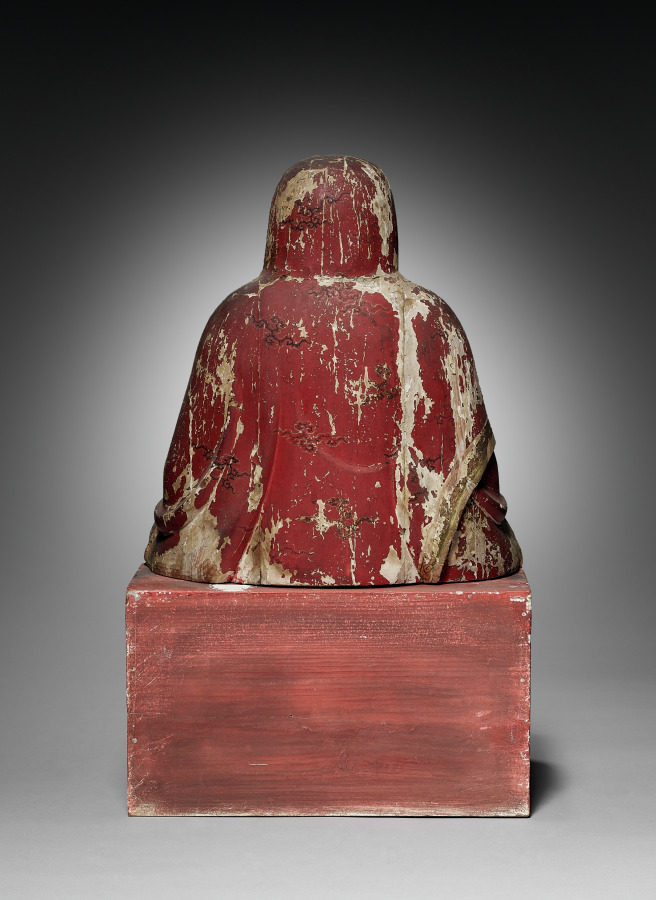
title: Rakan (Arhat) ?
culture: Japan, Edo period (1615–1868)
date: early to mid-1800s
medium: wood, gesso, pigment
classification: Wood